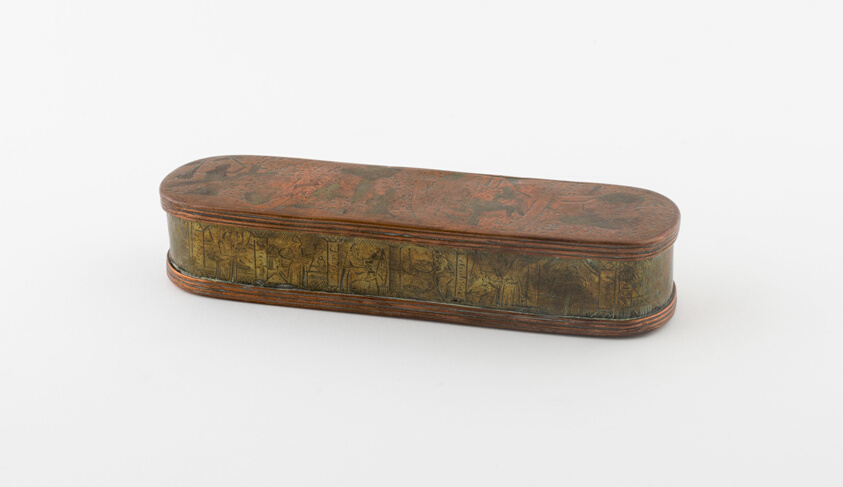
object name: Metalwork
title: Tobacco Box with Scenes Related to the Crucifixion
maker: Probably Amsterdam, Netherlands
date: 18th century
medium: Brass and copper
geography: Amsterdam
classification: wood; crucifixion; european decorative arts; metalwork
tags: religion